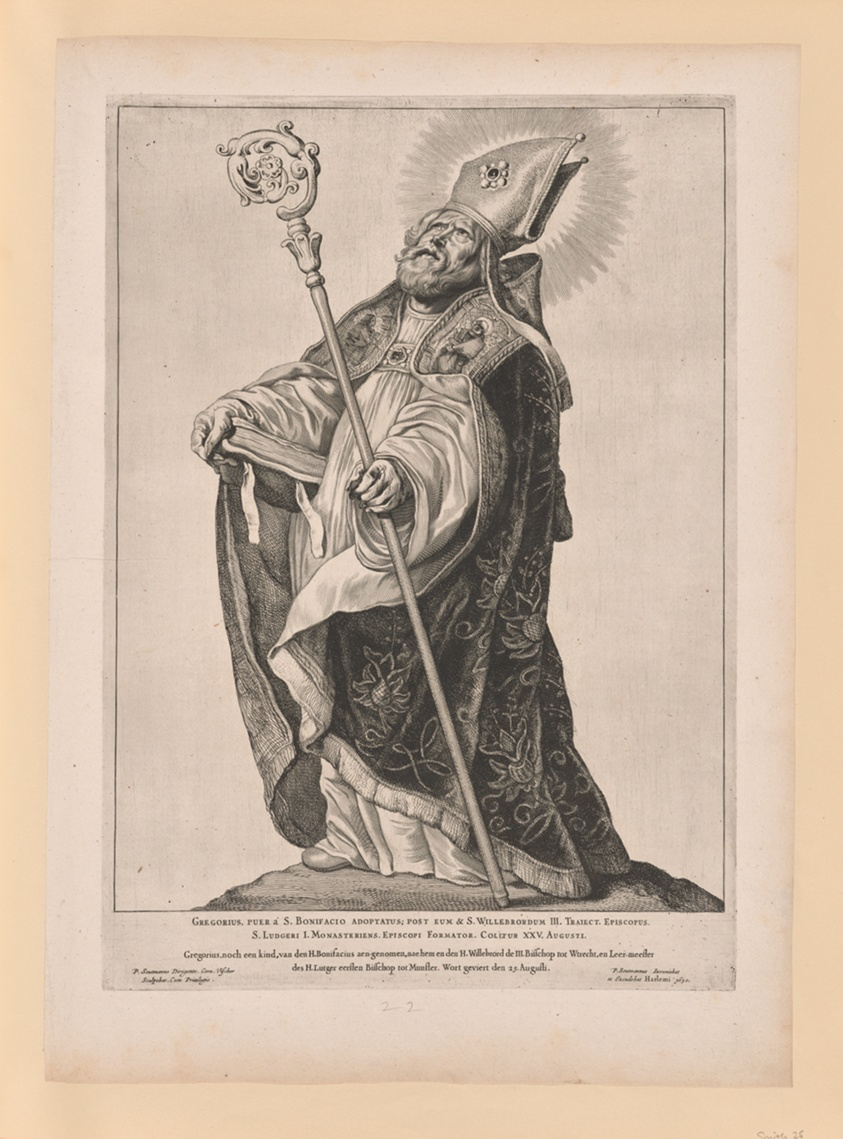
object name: Print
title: Saint Willebrord, from Saints of the North and South Netherlands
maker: Cornelis Visscher (Dutch, c. 1629-1658); after Pieter Claesz. Soutman (Dutch, c. 1580–1657)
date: 1650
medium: Etching and engraving on paper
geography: Netherlands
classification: engraving; paper; print; prints and drawing